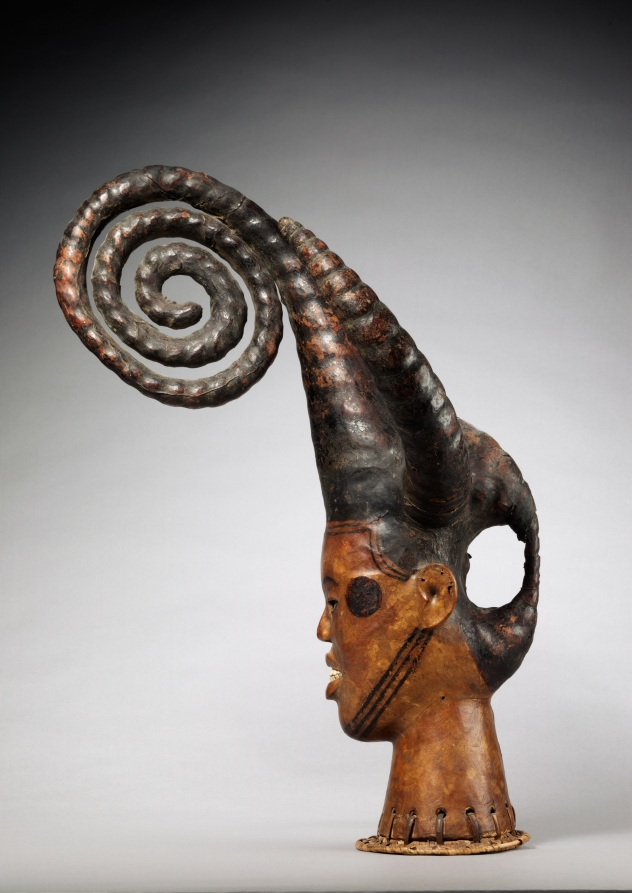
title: Headdress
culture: Africa, West Africa, Nigeria, Ejagham-style maker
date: early 1900s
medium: Wood, rawhide, cane, paint, bone or ivory, natural fiber, and metal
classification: Mask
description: Headdresses or crest masks made of antelope skin stretched over a carved head are a distinctive art form of the Cross River region in southeastern Nigeria and western Cameroon. This female evocation of ideal feminine beauty was most probably worn by an Ejagham woman in the context of a female society called Ekpa, which was responsible for the education of girls in preparation for marriage.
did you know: The headdress represents a girl that evokes ideal female beauty and is ready for marriage. The depicted hairstyle was worn during the coming-out ceremony following the girls’ seclusion.